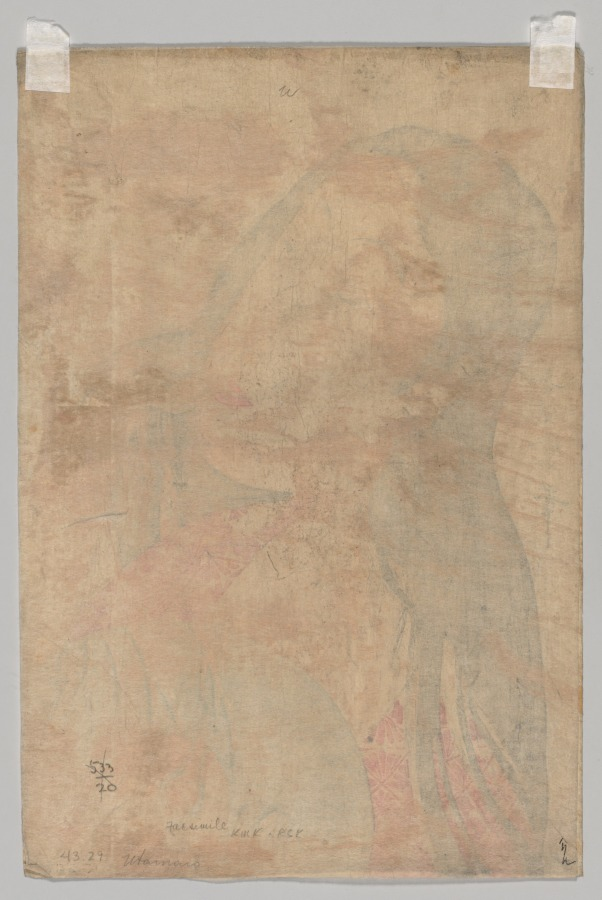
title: Bust of Woman with Loose Hair Holding Fan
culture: Japan, Edo period (1615–1868)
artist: Kitagawa Utamaro (Japanese, c. 1754–1806)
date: 1753–1806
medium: color woodblock print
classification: Print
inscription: Signature: Utamaro gude Publisher Seal: Murataya Jihe